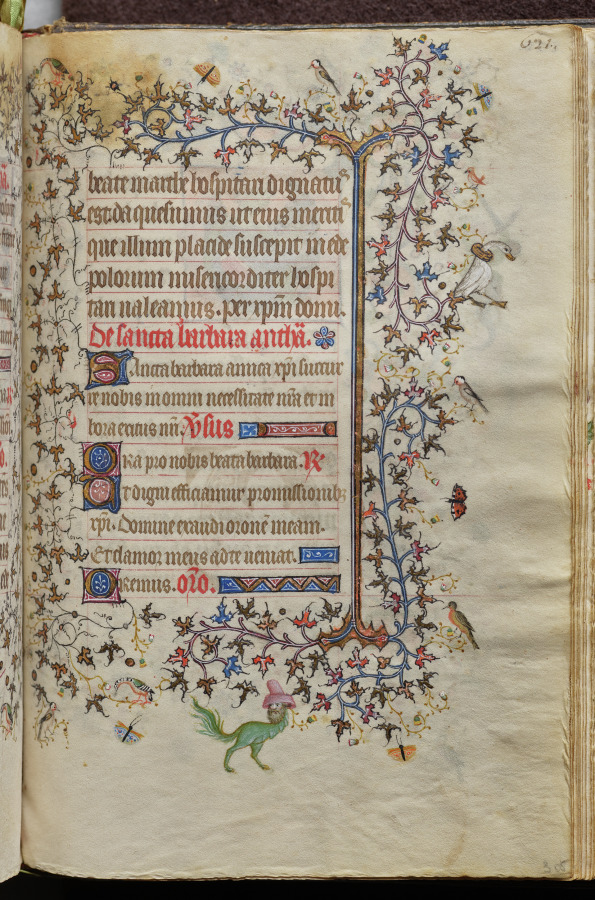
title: Hours of Charles the Noble, King of Navarre (1361-1425): fol. 305r, Text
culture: France, Paris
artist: Master of the Brussels Initials and Associates (French)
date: c. 1405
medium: ink, tempera, and gold on vellum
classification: Bound Volume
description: This precious volume was obviously highly prized by its owner, the French-born King of Navarre, who had his coat of arms painted on no less than twenty folios. Rather than directly commissioning this manuscript from a specific workshop, it seems that Charles the Noble acquired his book of hours -- perhaps ready-made for the luxury market -- while on a trip to Paris in 1404-05. A collaborative effort, six painting styles are evidenced within the pages of this codex, those of two Italians, two Frenchmen, and two Netherlanders. The painter who was responsible for the planning and decoration of the book, and who produced seventeen of the large miniatures, was a Bolognese artist known as the Master of the Brussels Initials. His principal assistant, responsible for most of the borders, was a Florentine who signed his name "Zecho" da Firenze on folio 208 verso.